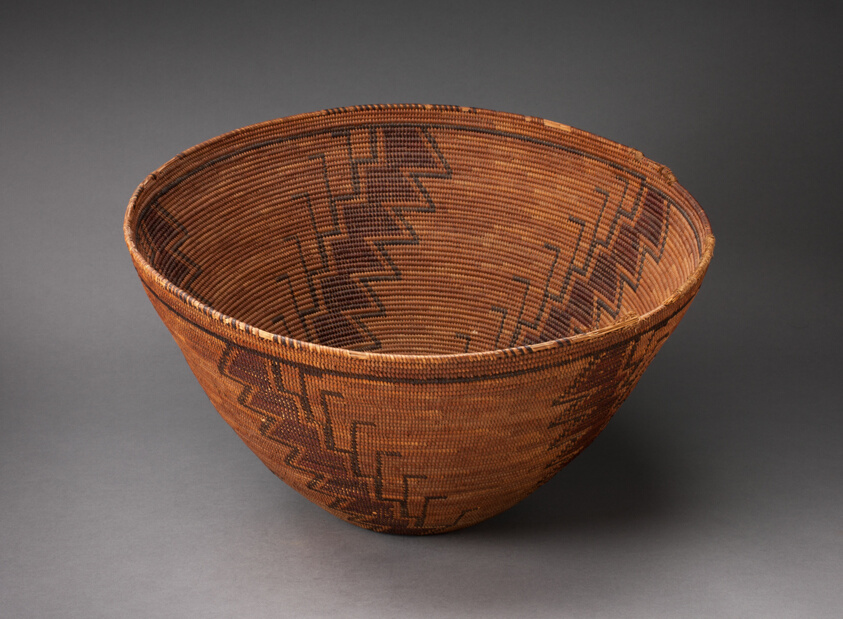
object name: Basketry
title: Coiled Storage Basket with Serrated-line Design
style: pomo, native american, northern california, Arts of the Americas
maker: Pomo (Northern California, United States)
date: 1880–90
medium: Natural vegetable fibers with pigment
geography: California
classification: basketry; plant fiber; art of the americas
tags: basketry, baskets